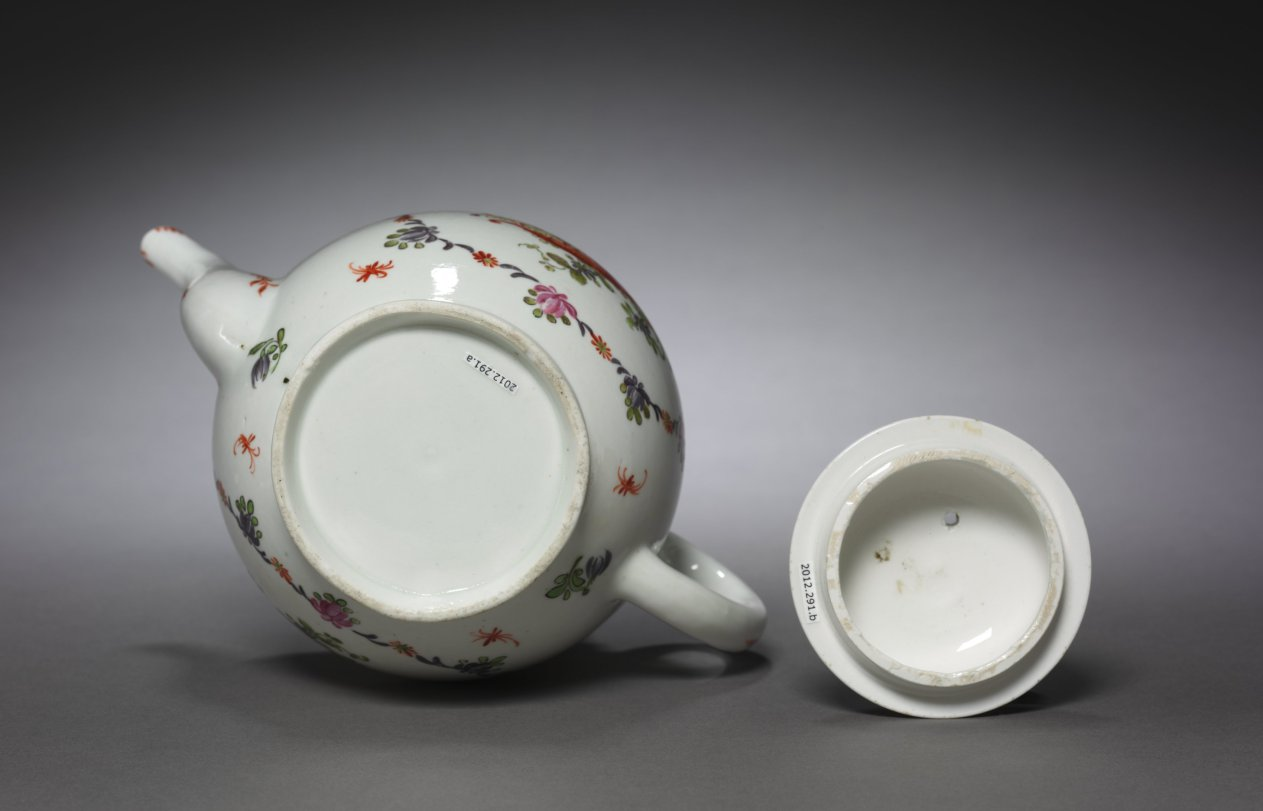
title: Teapot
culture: Staffordshire, England, late 18th century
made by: New Hall Porcelain Factory (British)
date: c. 1782–1790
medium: porcelain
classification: Ceramic